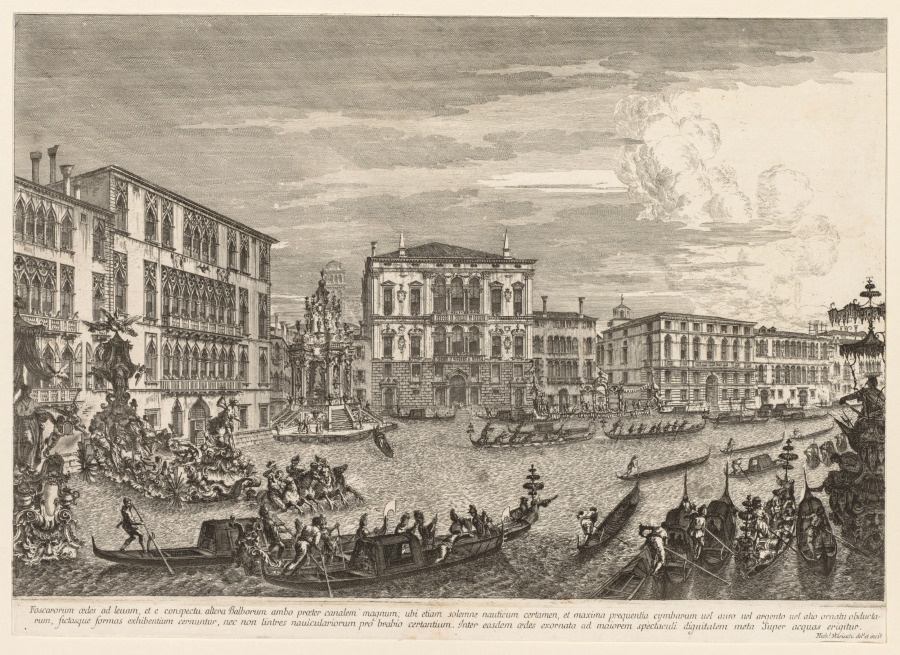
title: Views of Venice: The Regatta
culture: Italy, 18th century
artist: Michele Marieschi (Italian, 1710–1743)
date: 1741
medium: etching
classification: Print